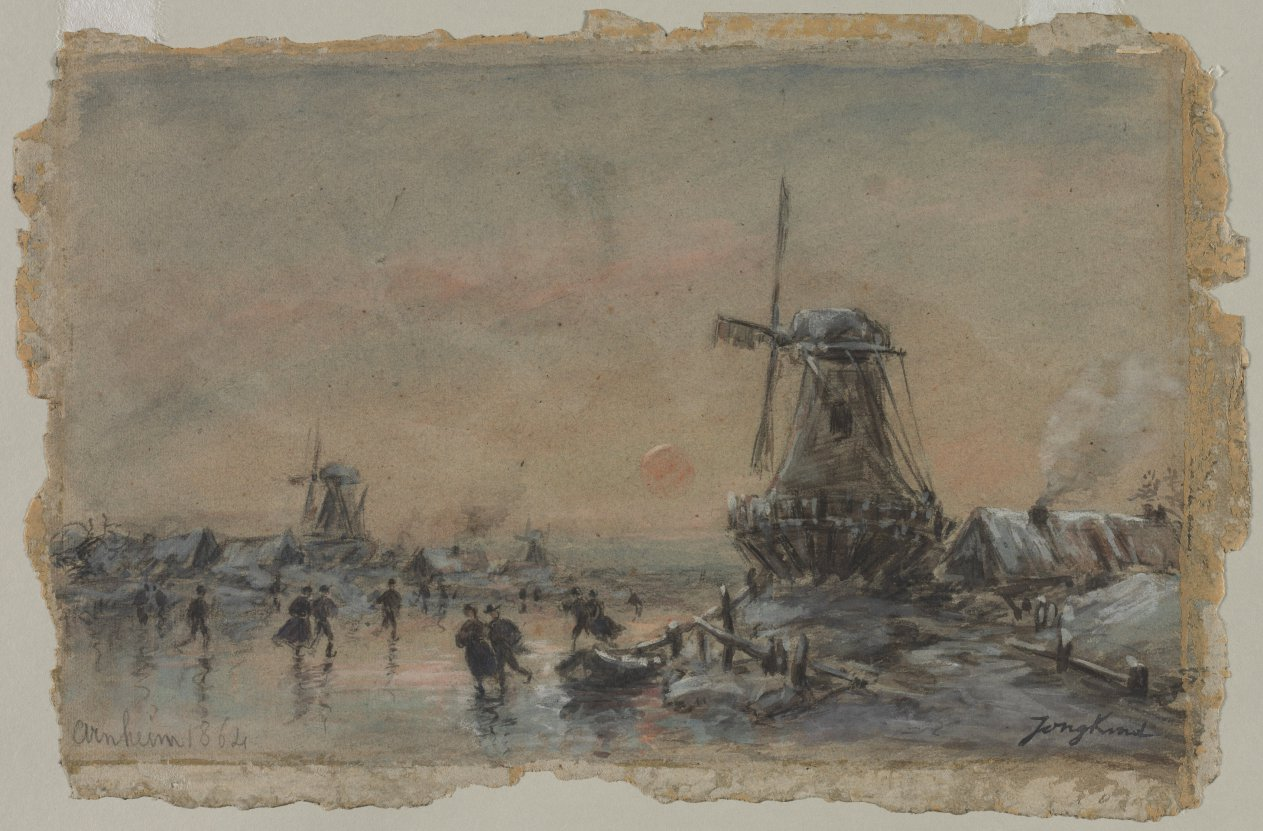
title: View of Arnheim (recto)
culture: Netherlands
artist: Johan Barthold Jongkind (Dutch, 1819–1891)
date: 1864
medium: black chalk, watercolor, and gouache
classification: Drawing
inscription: signed, lower right, in black gouache: Jongkind ; by artist, lower left, in graphite: Arnheim 1864